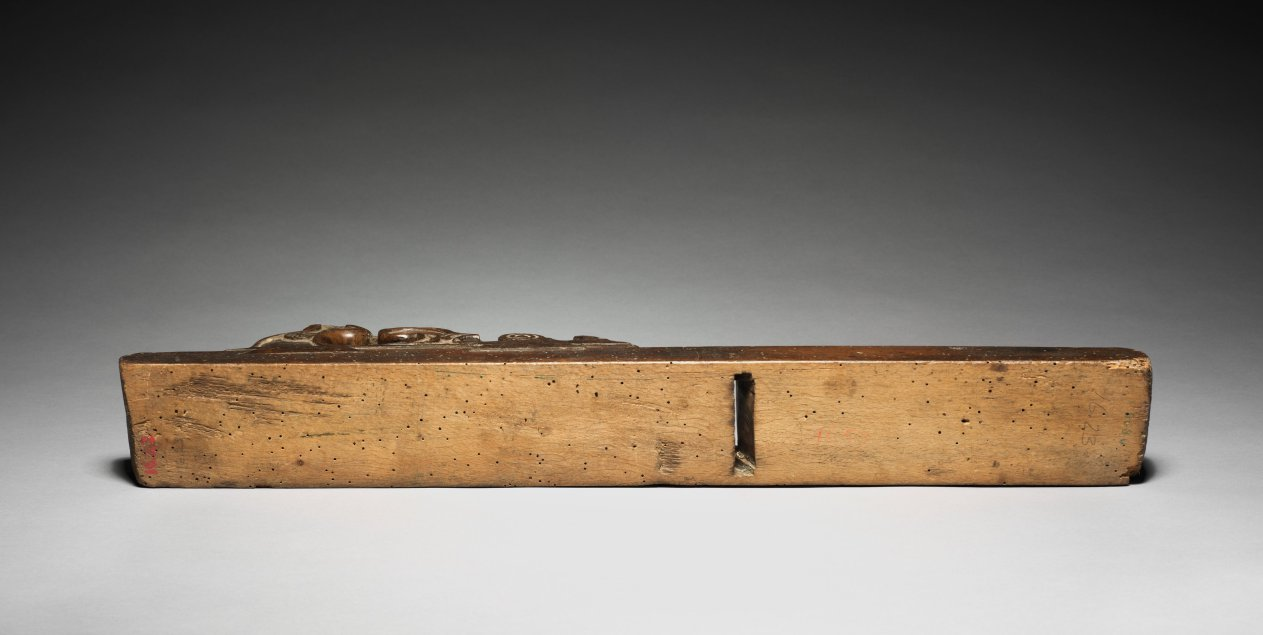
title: Carpenter's Plane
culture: Italy, early 17th century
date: early 1600s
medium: wood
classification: Tool